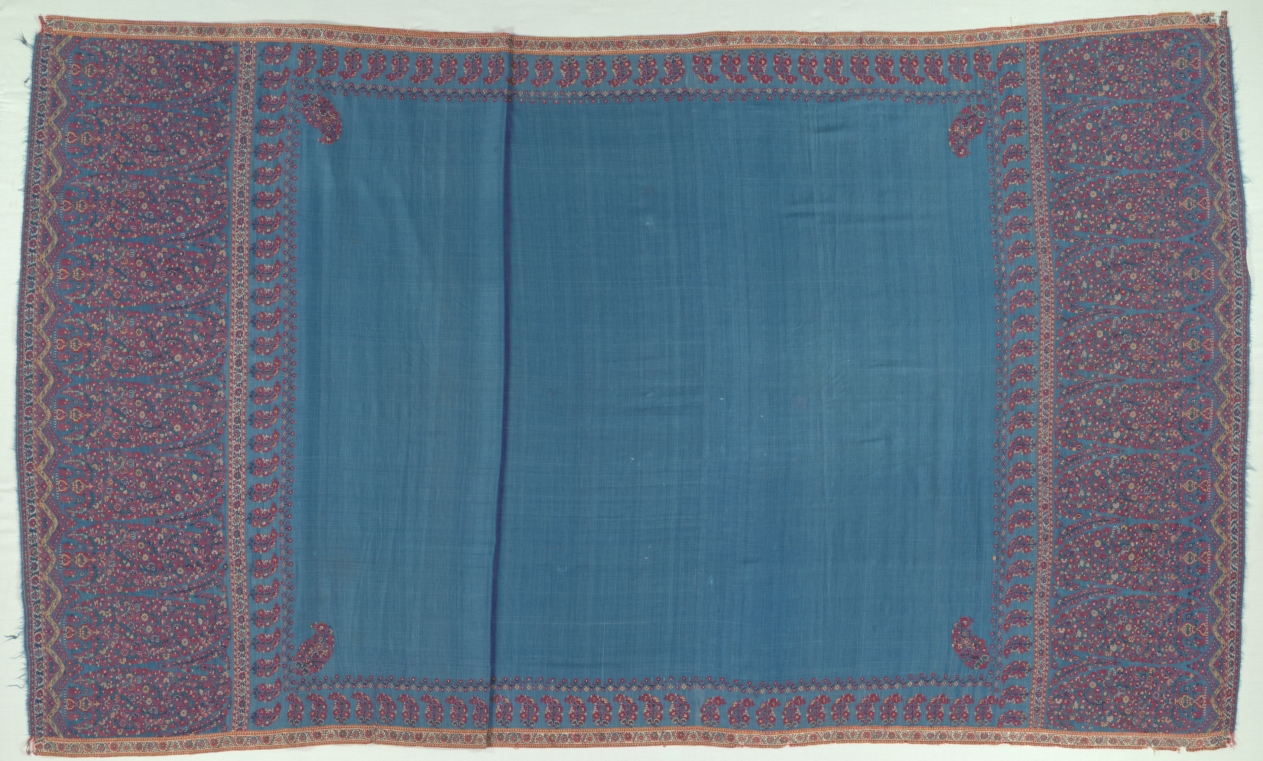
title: Shawl with boteh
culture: India, Kashmir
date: 1820–1830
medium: 2/2 twill tapestry weave, double interlocked: wool, possibly pashmina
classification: Textile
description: Thousands of luxurious shawls imported from Kashmir, India, were status symbols that European-manufactured imitations could not equal. Those woven in Paisley, Scotland, gave rise to the popular term paisley. Their representation in portraits records the evolution of shawl fashions, which helps to date surviving examples. The coveted quality of Kashmir shawls was achieved with luxurious fine goat hair woven in twill tapestry to form small colorful blossoms. Such shawls are lightweight, supple, and warm. A plethora of blossoms arranged in small vases on stands form the large paisley or boteh motifs, while smaller versions enliven the sides of the field. Such floral displays evolved from blossoming plants possibly in 16th-century India.